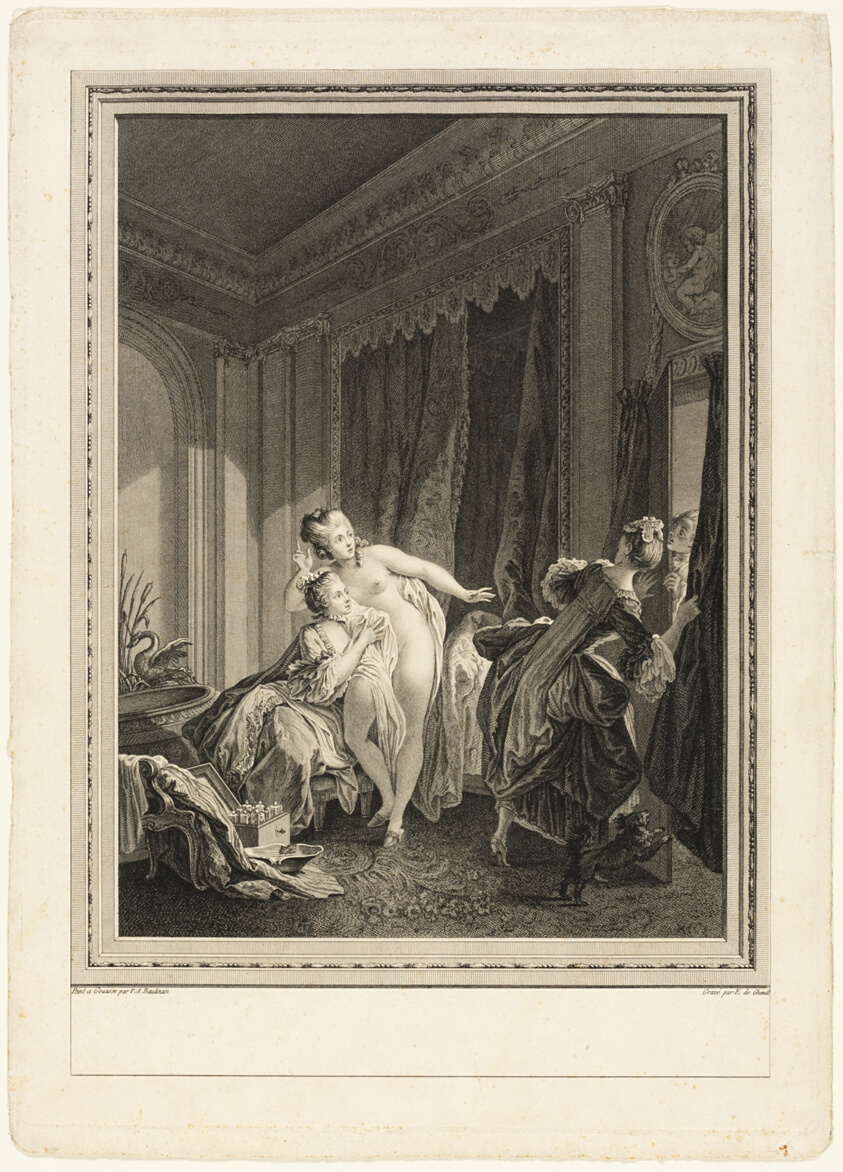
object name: Print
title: Evening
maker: Emmanuel Jean Nepomucene de Ghendt (French, 1738-1815); after Pierre Antoine Baudouin (French, 1723-1769)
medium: Etching on paper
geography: France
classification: etching; print; prints and drawing